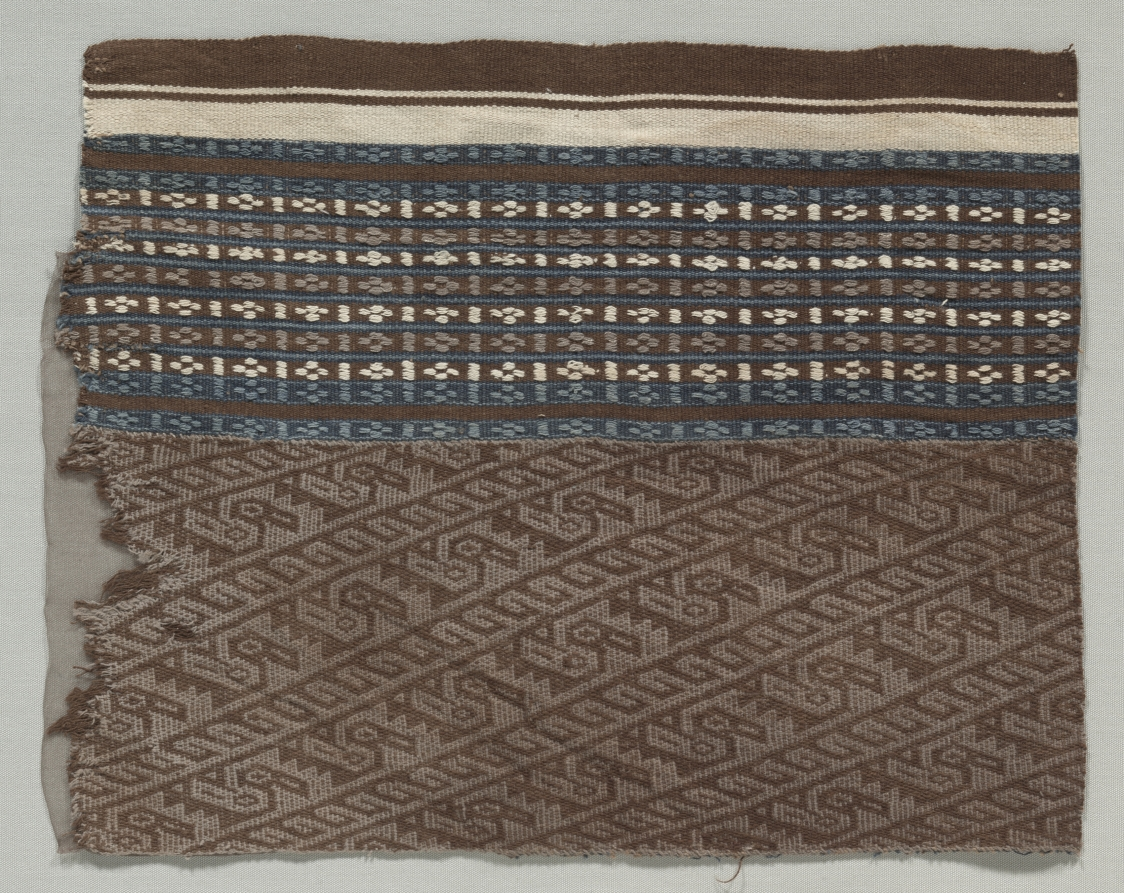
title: Fragment Composed of Two Fabrics Joined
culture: Peru, Central Coast, Chancay, 12th-15th century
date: c. 1100–1400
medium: plain compound twill and plain compound tabby; cotton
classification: Textile